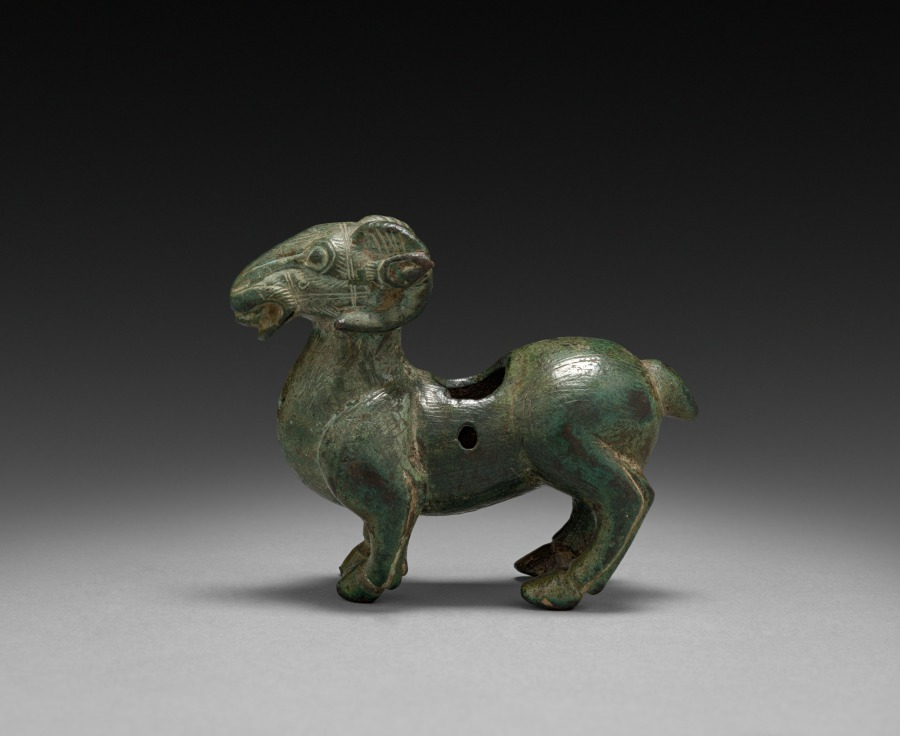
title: Zun in the Shape of a Ram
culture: China, Han dynasty (202 BCE–220 CE) to Six Dynasties (265–587 CE)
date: 206 BCE–220 CE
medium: bronze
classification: Sculpture